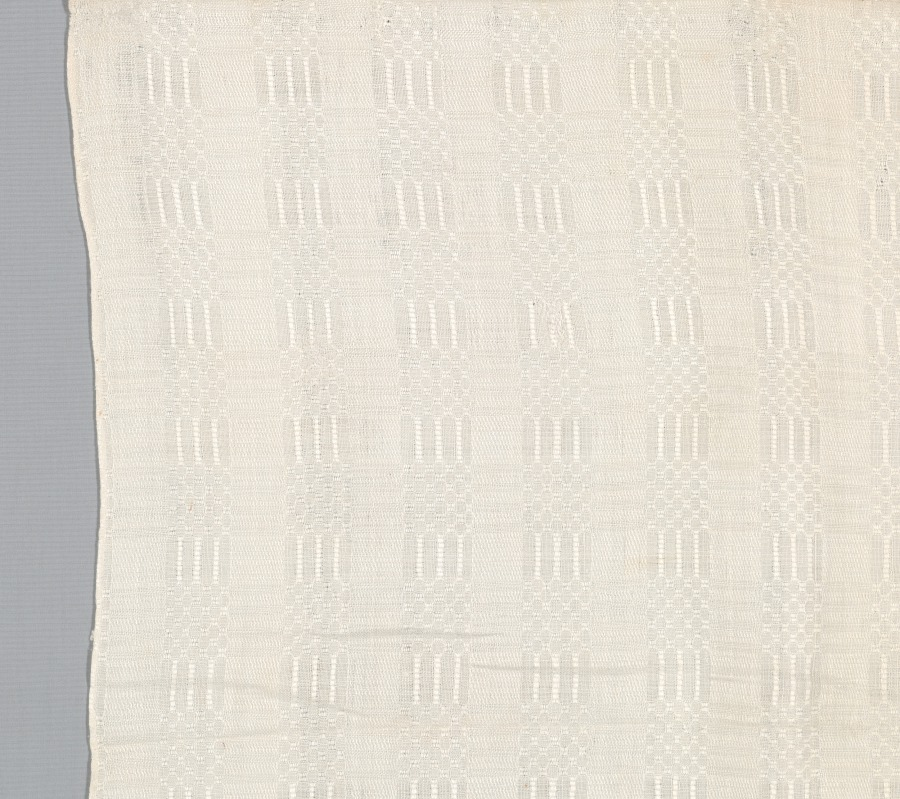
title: Tablecloth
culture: America, Connecticut, early 19th Century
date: c. 1800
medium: linen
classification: Textile